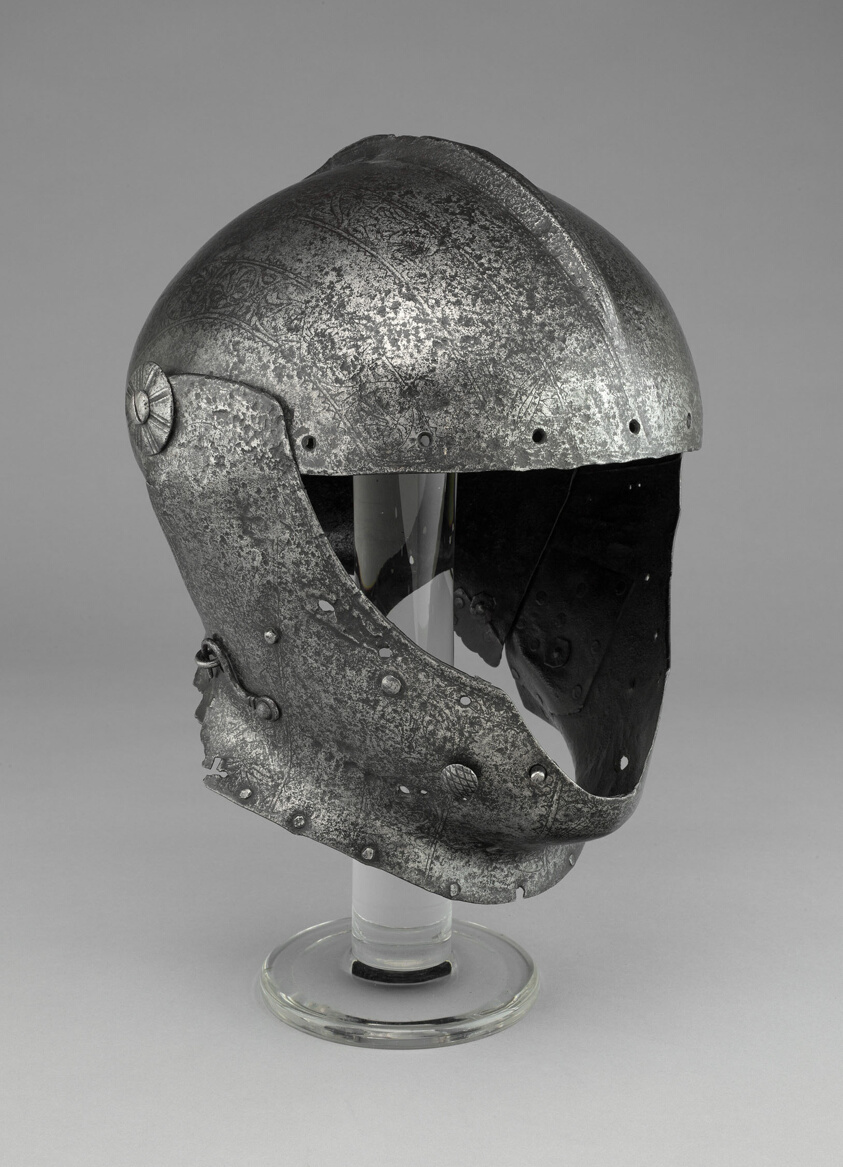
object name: Armor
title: Close Helmet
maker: Domenico dei Barini, called Negroli (Italian, Milan, 1492—c. 1516)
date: c. 1510/15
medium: Steel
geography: Milan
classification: suit-helmet; armor; arms and armor